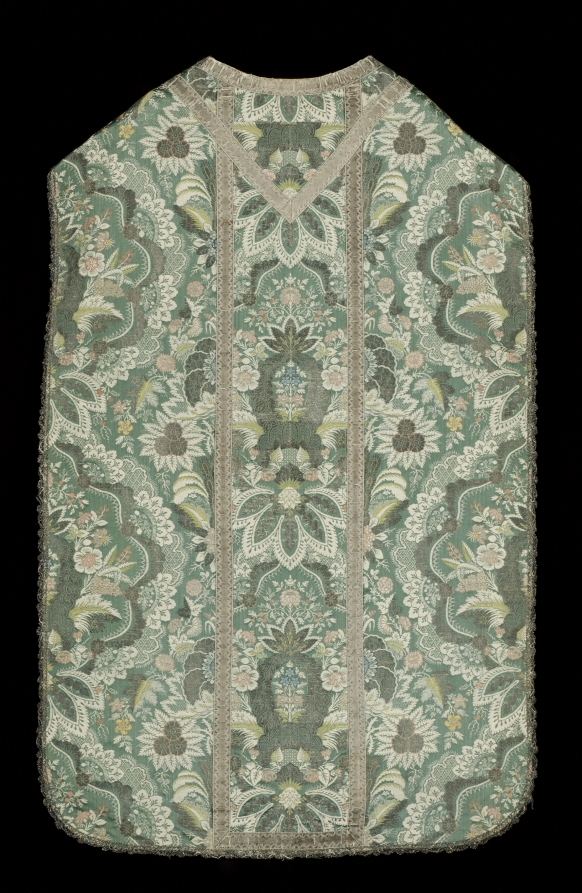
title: Chasuble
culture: France, Louis 14th style, 18th century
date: c. 1720s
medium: Silk; tabby weave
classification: Textile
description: The elegant formal design of blossoms and leaves in this woven silk is especially suitable for chasubles, liturgical vestments worn over albs with lace flounces and cuffs. Its small detailed ornament is reminiscent of prestigious lace, and is known as “lace pattern.” The division of the surface into three panels reflects the outmoded fashion of highlighting a different fabric in the center, often with religious images, called orphrey bands. In another change of ecclesiastical fashion, woven silks, such as this splendid example in the style of King Louis XIV (ruled 1638–1715) of France, were replaced during the early 1700s by embroidered decoration, which dominates in this exhibition.